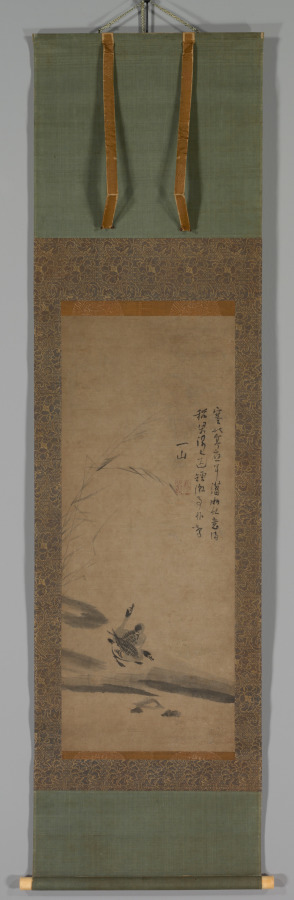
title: Reeds and Geese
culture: Japan, Kamakura period (1185–1333)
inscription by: Yishan Yining [Issan Ichinei] (Chinese, 1247–1317)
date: 1314–17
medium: hanging scroll; ink on paper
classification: Painting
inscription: signed: Issan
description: Reeds and geese has been a common pairing in Chinese literary and visual culture for many centuries. This painting presents the contribution of a Japanese amateur painter, almost certainly a Zen Buddhist monk, to Japan’s fledgling efforts to add the theme to its own cultural vocabulary in the early 1300s. As was customary at the time in Japan, the painter did not sign or seal his work; the inscription, a poem added to the painting by the eminent émigré monk Yishan Yining, along with his signature and seal, was of far greater cultural value. Today, the modestly sized painting has tremendous significance as one of the earliest surviving examples of Japanese ink paintings with reeds and geese.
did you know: Tokyo National Museum owns a copy of this painting made by Kano Gyokusen (1796–1864) when he was 14 years old.